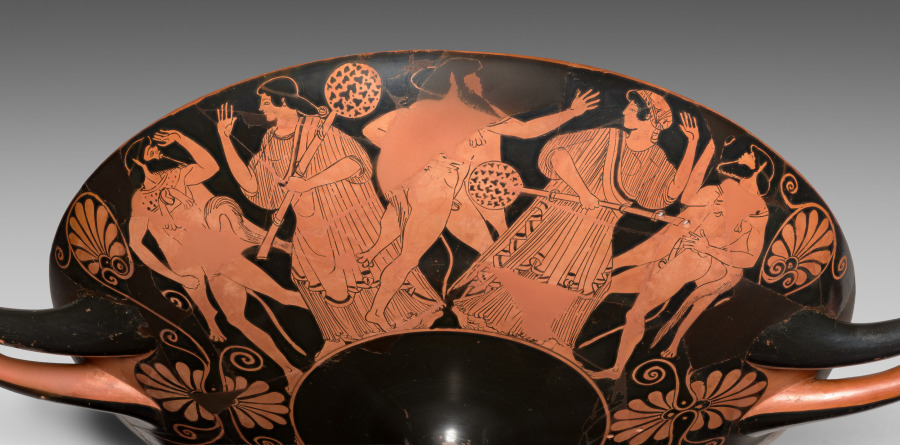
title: Red-Figure Kylix (Drinking Cup): Dionysos and Satyr (I); Satyrs and Maenads (A, B)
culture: Greece, Athens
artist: attributed to Douris (Greek, Attic, active c. 500–470 BCE)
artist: or Painter of London E 55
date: c. 480 BCE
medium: ceramic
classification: Ceramic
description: Reconstructed from 72 fragments, this cup has been repaired several times, indicating its enduring value to owners. Pairs of holes straddling cracks once held ancient wire or clamp repairs. Numerous incomplete holes may signify recent interventions. Early modern efforts to hide cracks and certain features of the satyrs that could have offended sensibilities of the time also masked the original artistry of its painting. So, for many years the cup languished in storage. Cleaning and reconstruction in 1952–53 revealed enough to allow attribution to a respected vase painter, Douris, reviving the cup’s reputation. More recently, a different attribution has been suggested, and a new conservation campaign replaced ancient parts from a different cup with modern reconstructions more like those lost.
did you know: In the tondo, a dancing satyr approaches the wine god Dionysos, who holds a kantharos and grapevine.